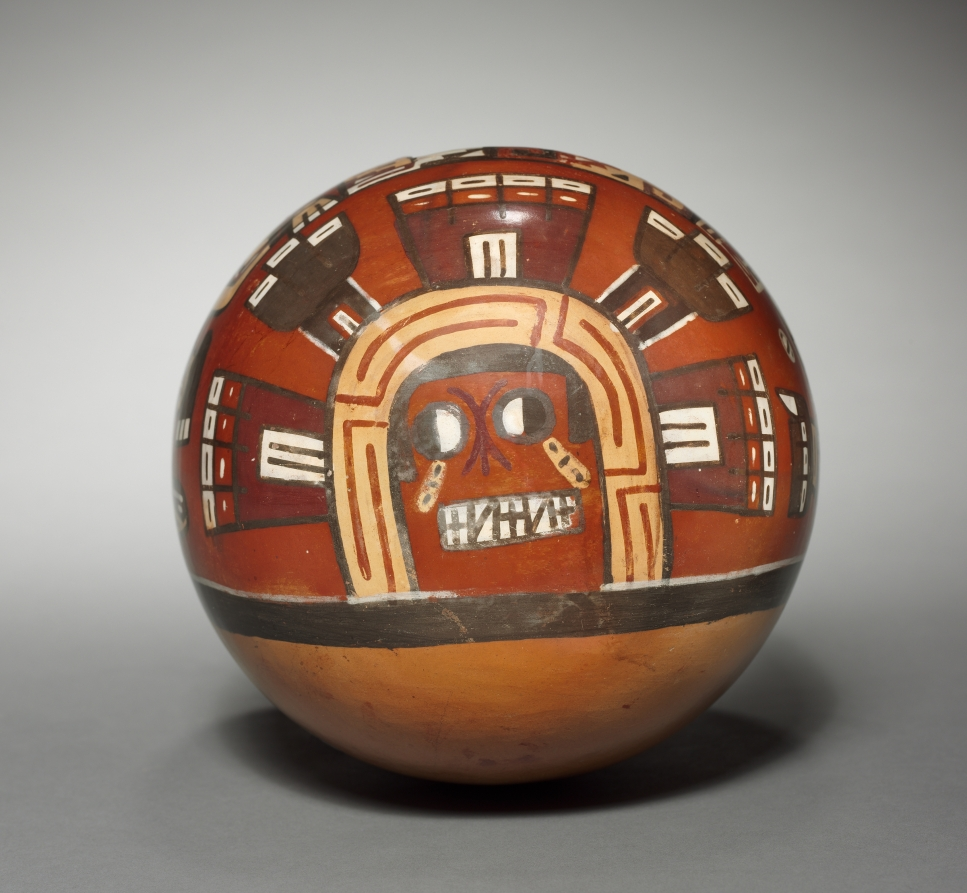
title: Container with Deity Head and Winged Attendants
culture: Central Andes, central coast, coastal Wari style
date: 600–1000 (Thermoluminescence date, 730–1190)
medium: ceramic and slip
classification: Ceramic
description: The head of the staff deity, the most important supernatural being depicted in Wari art, appears on the ends of this container, the function of which is mysterious. The sides feature two of the deity's attendants, each with a wing and N-shaped fangs drawn from the animal world. One of these creatures carries a staff, a supreme symbol of divine authority and power.